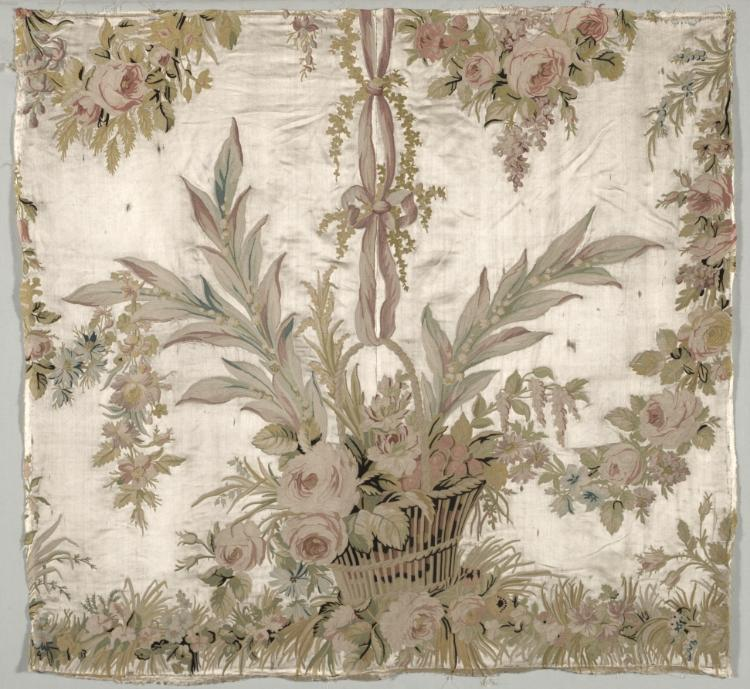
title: Coverlet Fragment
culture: France, 18th Century, period of Louis XVI (1774-1793)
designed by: Philippe de Lasalle (French, 1723–1805)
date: c. 1760–1770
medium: embroidered satin and silk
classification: Textile